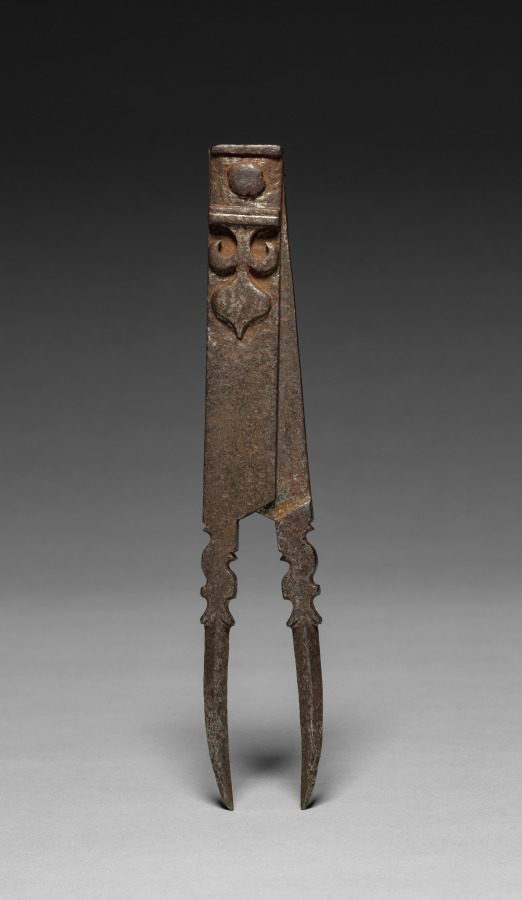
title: Dividers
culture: France, 16th century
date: 1500s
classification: Tool